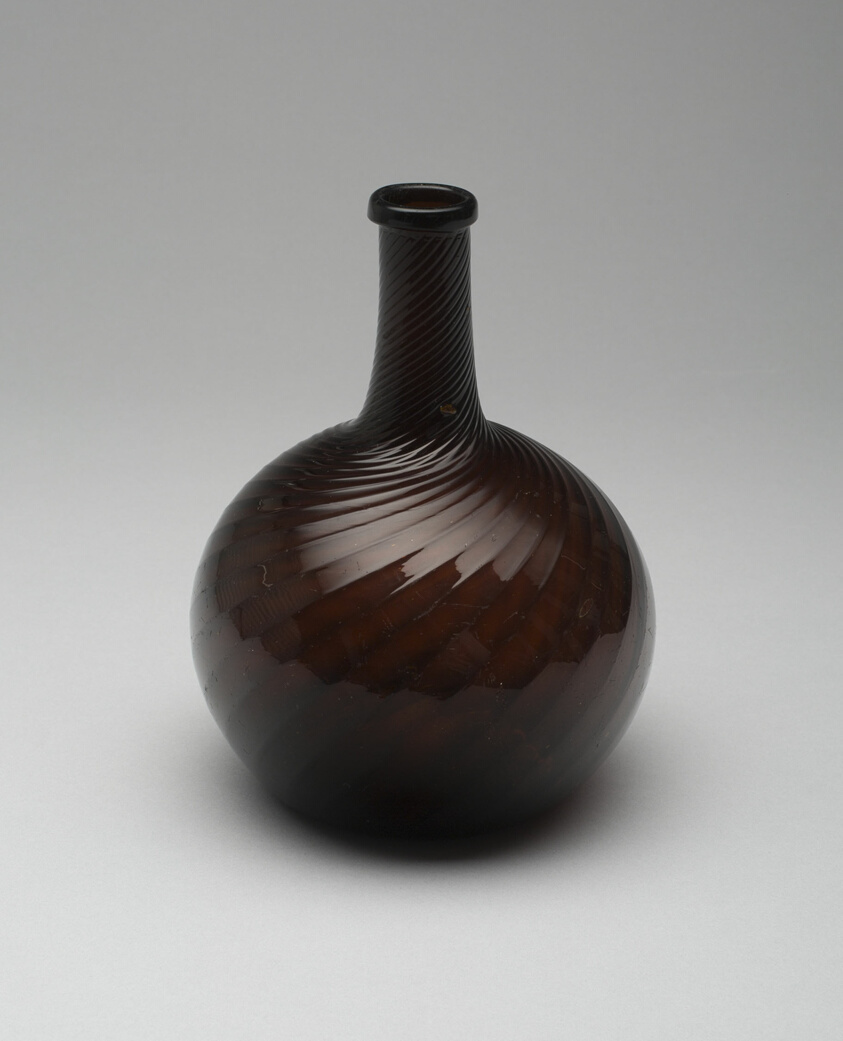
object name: Glass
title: Bottle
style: Folk Art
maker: Artist unknown (American, 19th century); Probably Ohio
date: 1835–45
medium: Pattern-molded blown glass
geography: Midwest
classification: bottle; glass; american decorative arts; american arts; decorative arts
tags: dining, drinking